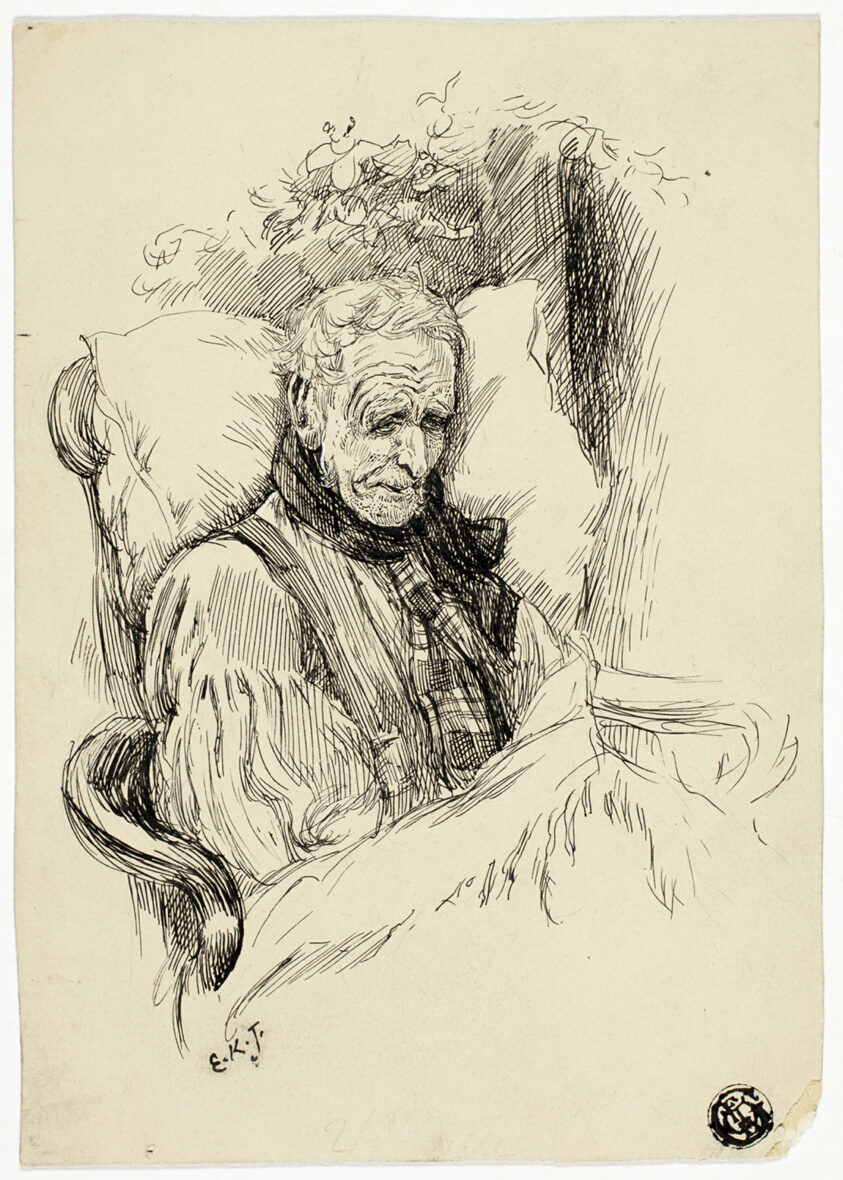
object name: Drawing and Watercolor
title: Dying Old Man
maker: Edward Killingworth Johnson (English, 1825-1896)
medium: Pen and black ink, heightened with traces of white gouache, on cream wove card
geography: England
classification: pen and ink drawings; drawings (visual works); prints and drawing